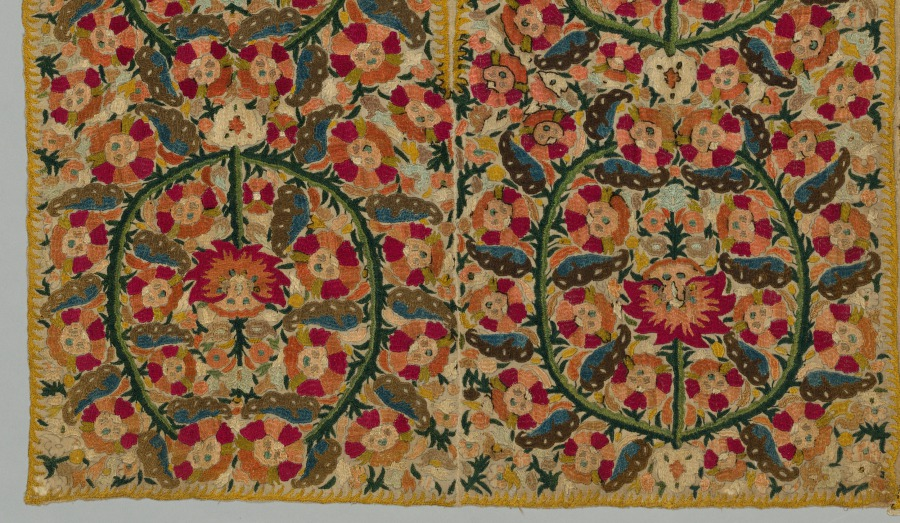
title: Four Borders from a Bedspread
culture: Greece, Epirus, Yaninna, 18th century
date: 1700s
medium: embroidery: silk on linen tabby ground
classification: Embroidery